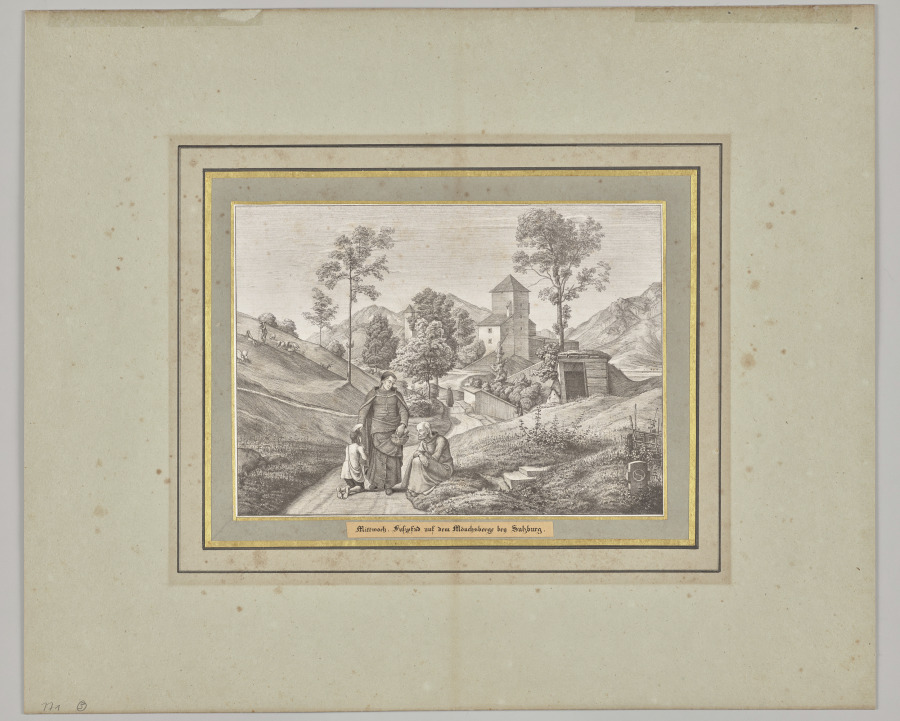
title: Wednesday. Footpath on the Mönchsberg near Salzburg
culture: Germany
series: Seven Areas from Salzburg and Berchtesgaden. Arranged according to the seven days of the week, connected by two allegorical sheets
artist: Ferdinand Olivier (German, 1785–1841)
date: 1818–23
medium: lithograph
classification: Print